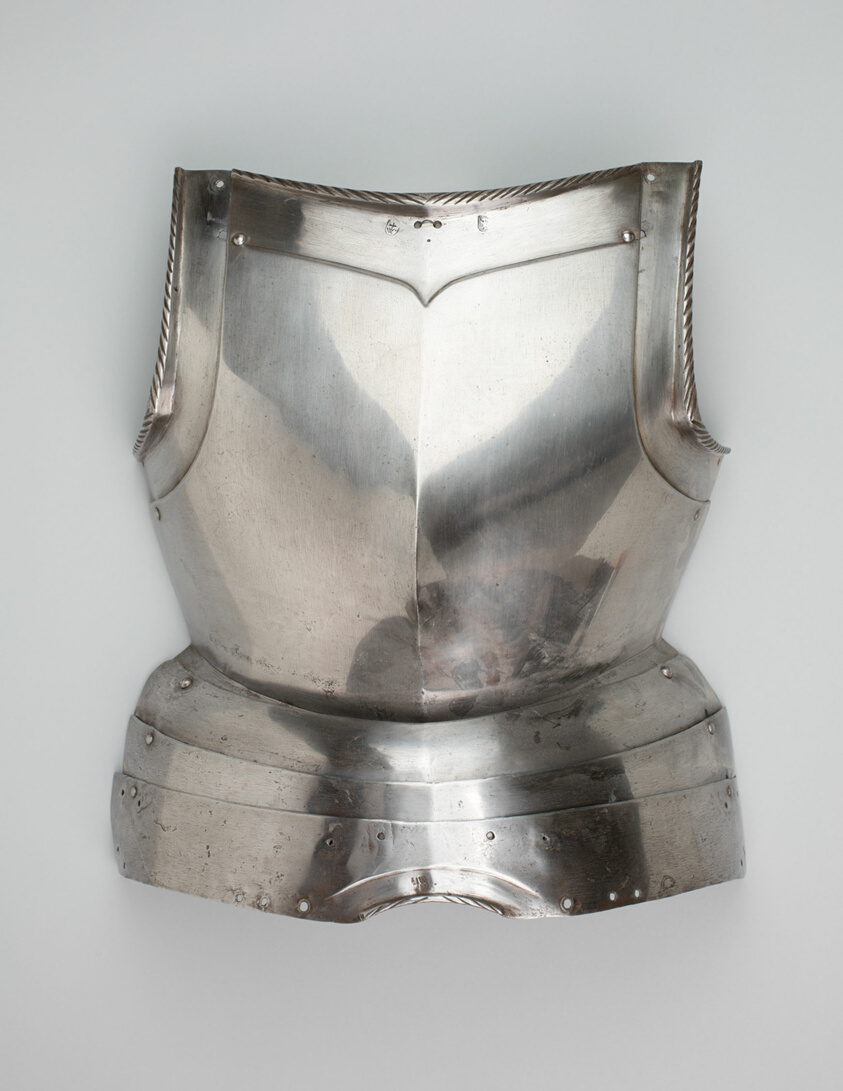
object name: Armor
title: Breastplate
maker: South German, Nuremberg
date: 1560-70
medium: Steel and leather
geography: Nuremberg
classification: suit-element; armor; arms and armor